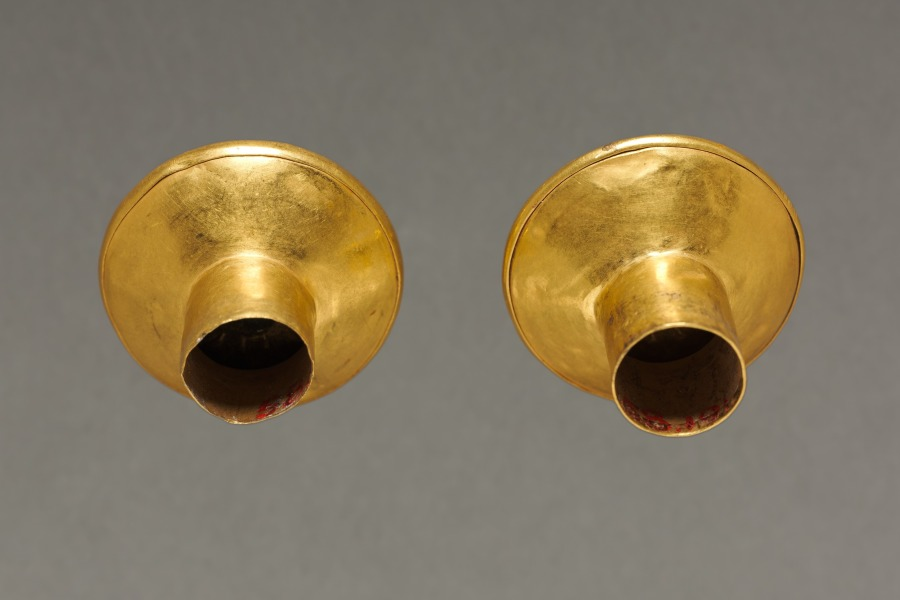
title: Ear Spool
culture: Panama, Conte style, 5th - 10th century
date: c. 400–900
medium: hammered gold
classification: Metalwork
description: Harvard archaeologists excavated the eight ornaments in this case from several burials at Sitio Conte, a cemetery famous for its lavish graves of powerful chieftains. The young man buried in Grave 26 was such a chief. His status was stunningly memorialized by 21 human companions and 475 objects, many of them personal ornaments made of gold, including the large chest plaque (no. 2) and the rod-shaped ear ornament (no. 3) shown here. The creature on the chest plaque, found close to the chief’s body, has reptile claws and perhaps the head crest of an iguana. Its meaning is unknown but perhaps, as in later periods, reptilian imagery and the warm gleam of gold linked rulers with the sun’s creative force.